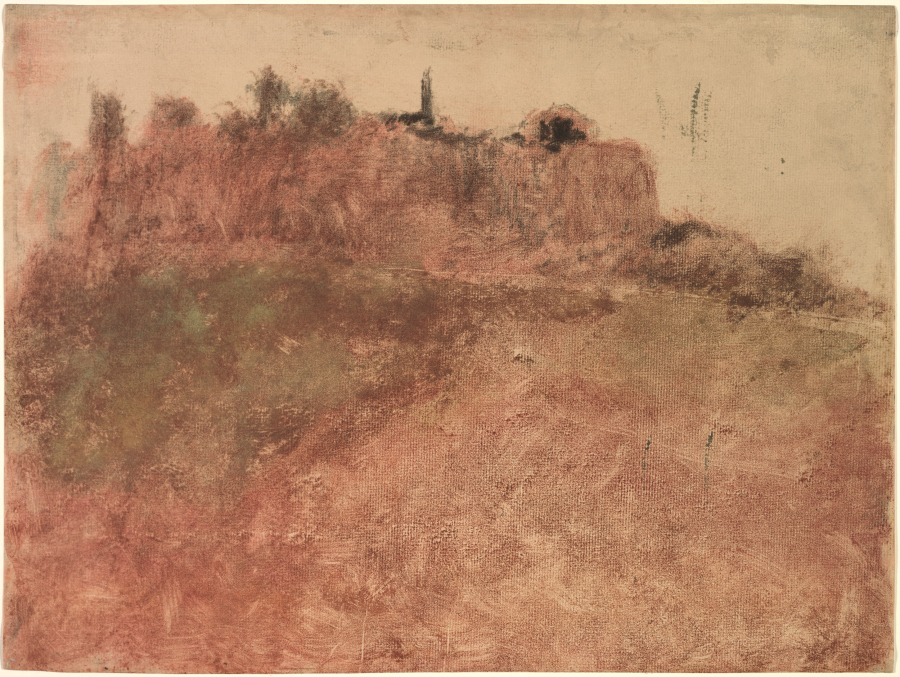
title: Estérel Village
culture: France, 19th century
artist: Edgar Degas (French, 1834–1917)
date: c. 1890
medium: color monotype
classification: Print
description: This landscape is one of many monotypes that Edgar Degas produced throughout his career. The work belongs to a series Degas made while visiting a friend in the French countryside. Its blurriness resembles the view he saw out the window of trains and carriages during his travels. To translate the effects of weather and the natural terrain, he created layers of color and texture that border on abstraction in the final composition.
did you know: Edgar Degas made a total of about 60 similarly abstract landscapes using monotype around the time he made this print.